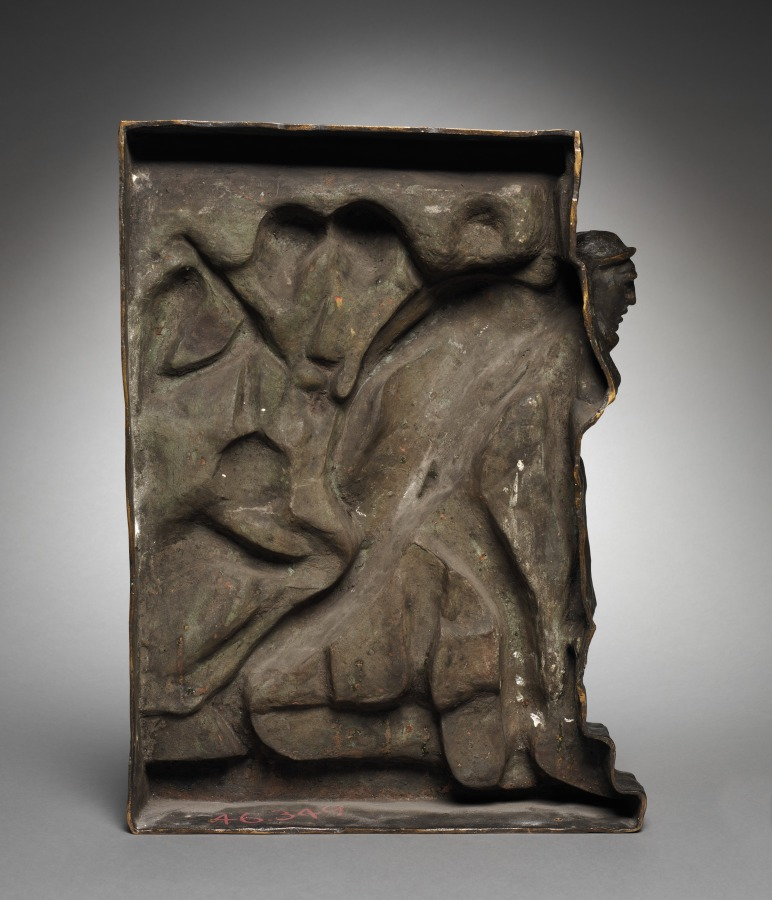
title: The Miners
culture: Belgium, 19th century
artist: Constantin Meunier (Belgian, 1831–1905)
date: c. 1890 – 1900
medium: bronze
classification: Sculpture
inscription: Signed on top: "C. Meunier"; inscribed on right side: "Atelier C. Meunier, 50 Rue (?)"